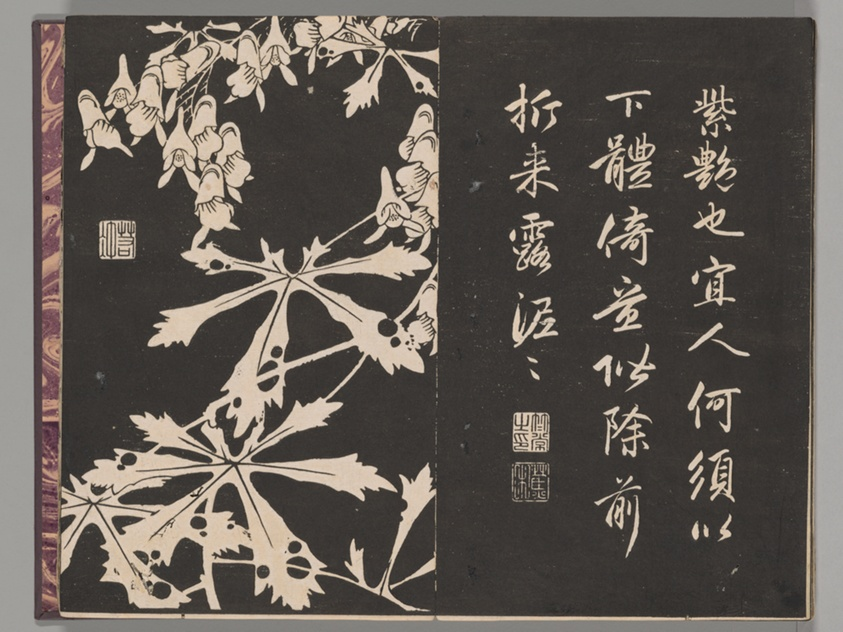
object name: Book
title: Soken sekisatsu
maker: Ito Jakuchu (Japanese, 1716-1800)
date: 1767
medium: Woodblock printed book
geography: Japan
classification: book